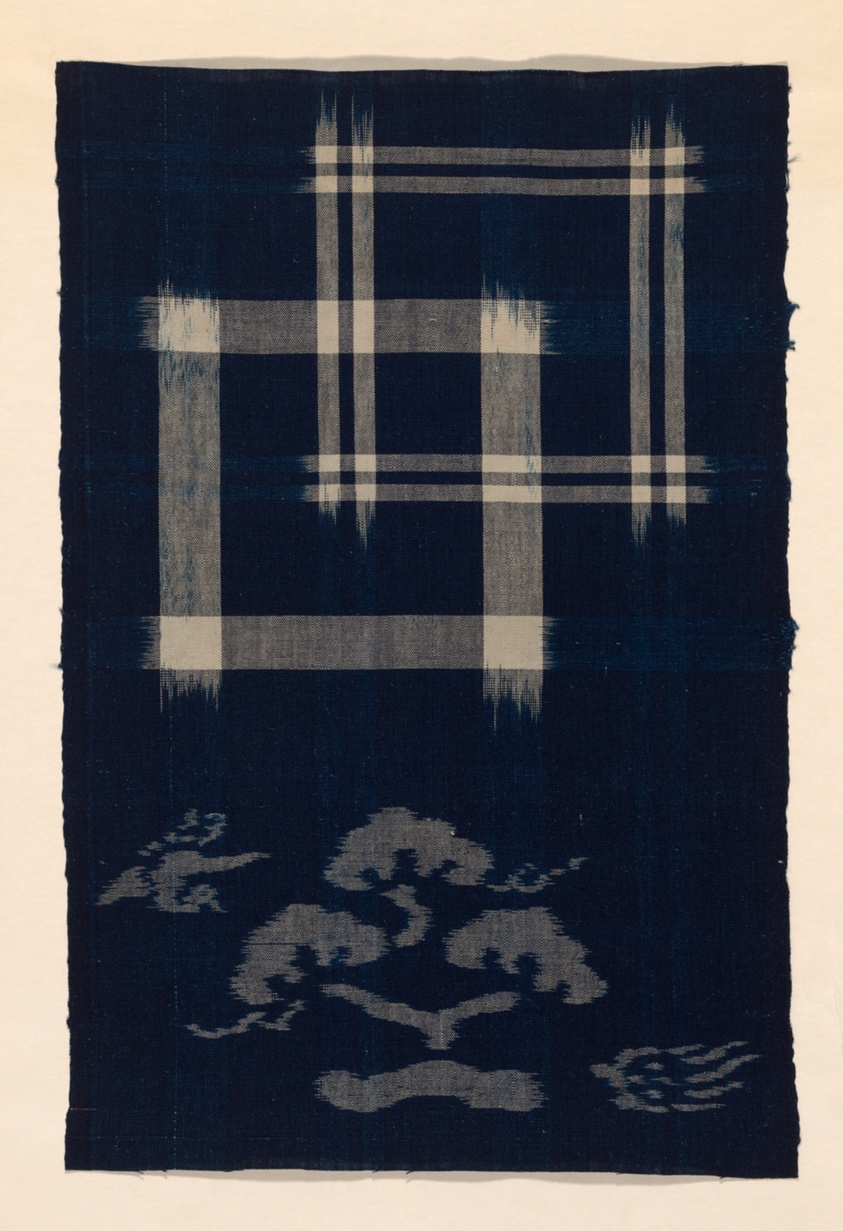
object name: Textile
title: Fragment (From a Kimono)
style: Japanism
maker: Japan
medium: Cotton, plain weave; warp and weft dyed (double ikat), mounted on paper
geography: Japan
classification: textile; weaving - printed